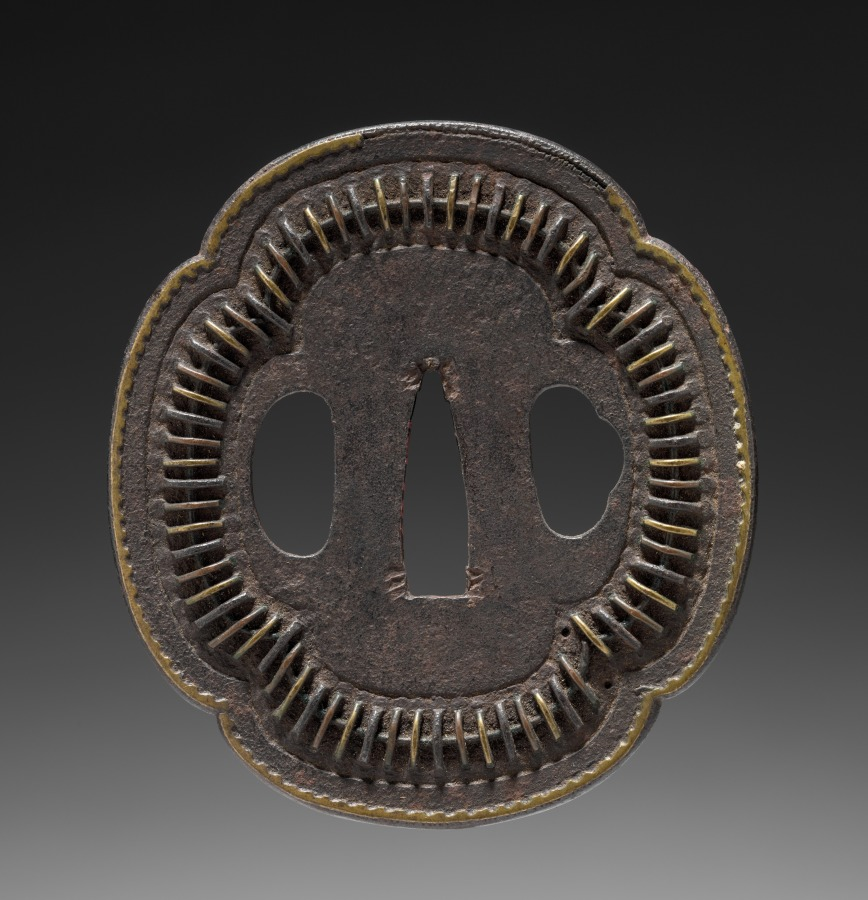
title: Sword Guard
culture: Japan, Edo period (1615–1868)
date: 1615–1868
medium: iron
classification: Arms and Armor